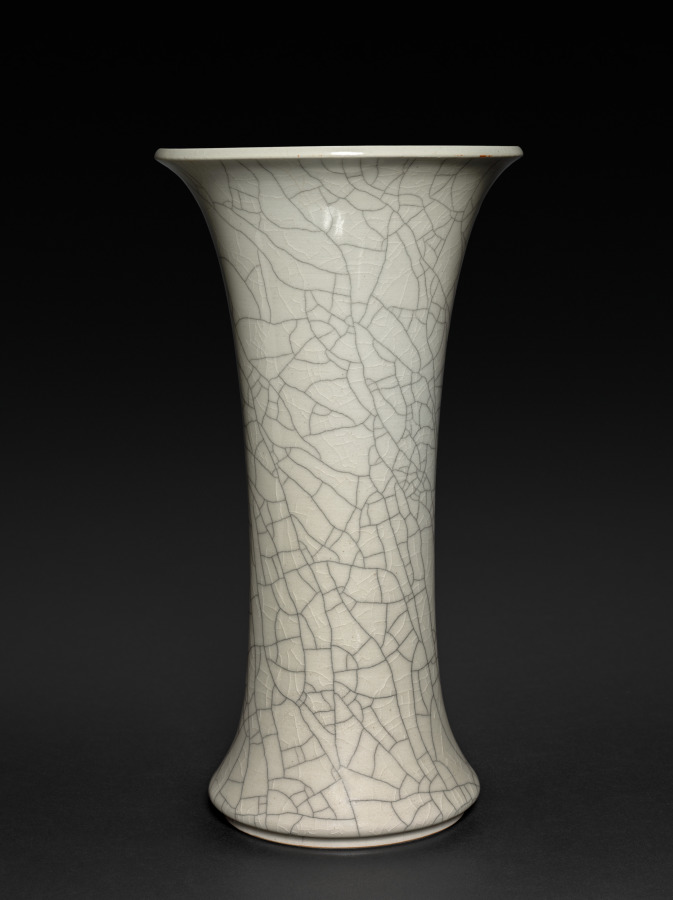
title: Gu-shaped Vase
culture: Japan, Meiji period (1868–1912)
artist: Seifū Yohei III (Japanese, 1851–1914)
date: 1912–14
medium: Porcelain with crackled glaze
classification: Ceramic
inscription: 清風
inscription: 清風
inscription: 帝室技芸員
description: Seifū Yohei III mined the repertoire of Chinese vessel types, from ceramics modeled after ancient ritual bronzes to shapes developed in the Yuan (1279–1368) and Ming (1368–1644) dynasties. His designs tended to be formal and restrained, often featuring creamy white glazes suggestive of the hue of Ding ware and green glazes resembling Longquan ware. This gu-shaped vase has a cracked-ice glaze, which was once customarily called Ge (Japanese pronunciation Ka), after the kiln where it purportedly originated during the Southern Song dynasty (1127–1279). The glaze’s double-crackle pattern, featuring both deeper and shallower cracks, is called “gold threads and iron lines.” The effect was enhanced here by coating the vessel with ink or another stain, which was allowed to seep into the cracks before the surface was wiped clean.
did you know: Gu-shaped vases are relatively slender cylinders that flare at both the mouth and foot with orbs or drumlike forms partway up the vessel.